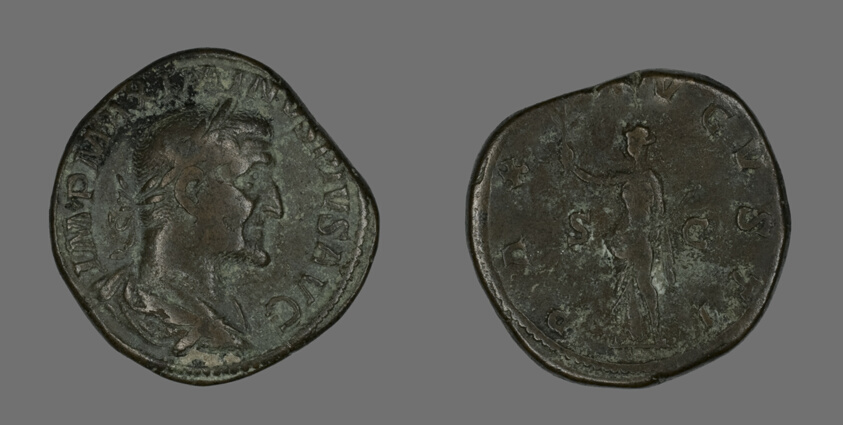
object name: Coin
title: Sestertius (Coin) Portraying Emperor Maximinus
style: roman (ancient, style or period)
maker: Roman, minted in Rome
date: 235-236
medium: Bronze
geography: Roman Empire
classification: coin; ancient art